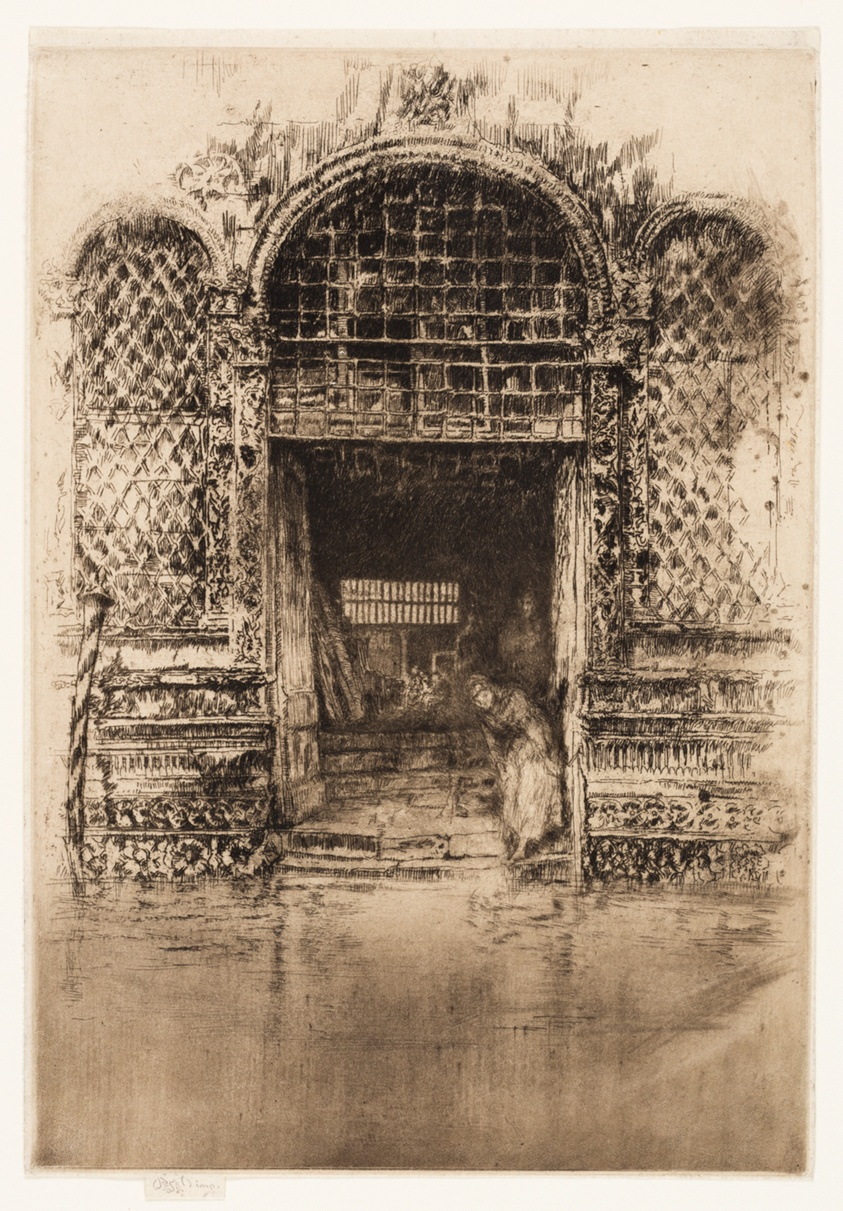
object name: Print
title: The Doorway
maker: James McNeill Whistler (American, 1834-1903)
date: 1879/80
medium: Etching, drypoint and roulette with foul biting in warm black, with selective wiping of plate tone, on cream laid paper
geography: United States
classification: etching; foul biting; print; prints and drawing; roulette; drypoint; paper